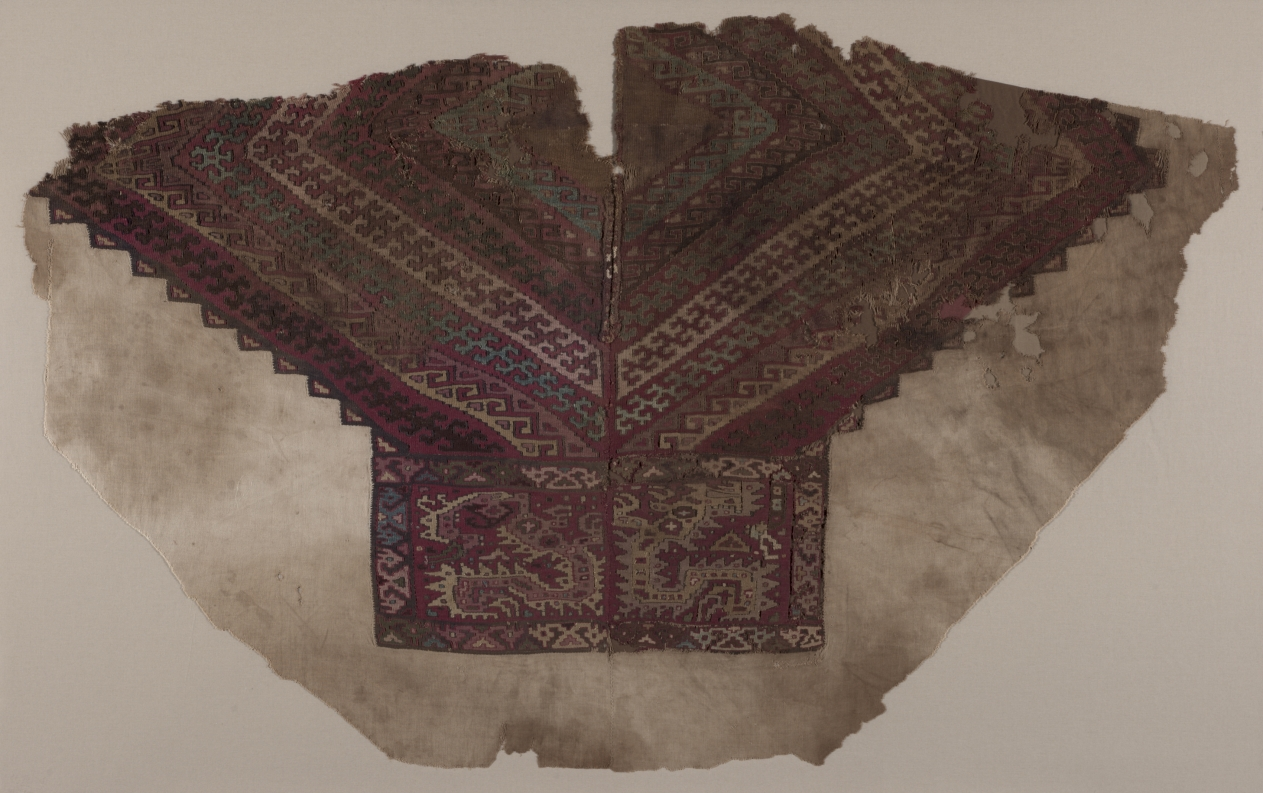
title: Tapestry-woven Yoke from a Tunic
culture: Central Andes, North Central Coast, Moche-Wari Style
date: 800–1200?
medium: camelid fiber and cotton, tapestry weave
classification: Textile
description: This fragment comes from the upper area of a tunic, with thick embroidery defining remnants of the neck opening. In the rectangular area on the chest are two similar long-tailed creatures rendered in a highly geometric style. Each is rotated 90 degrees, so their tails are parallel to the bottom edge. The cloven hooves on their upper legs may identify the creatures as deer or Andean camelids, such as llamas or alpacas.